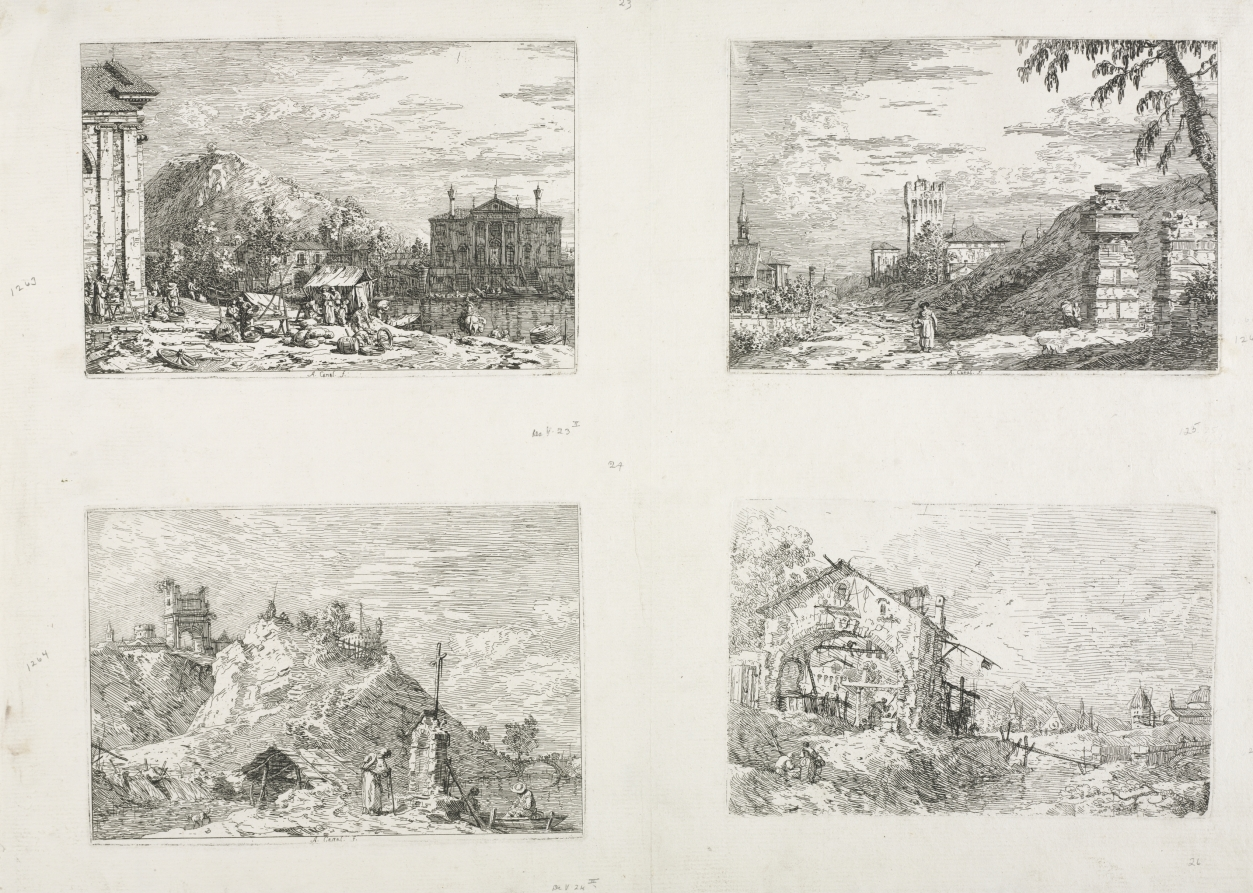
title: Views: A Pilgrim at Prayer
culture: Italy, Venice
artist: Antonio Canaletto (Italian, 1697–1768)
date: 1735–1746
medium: etching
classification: Print